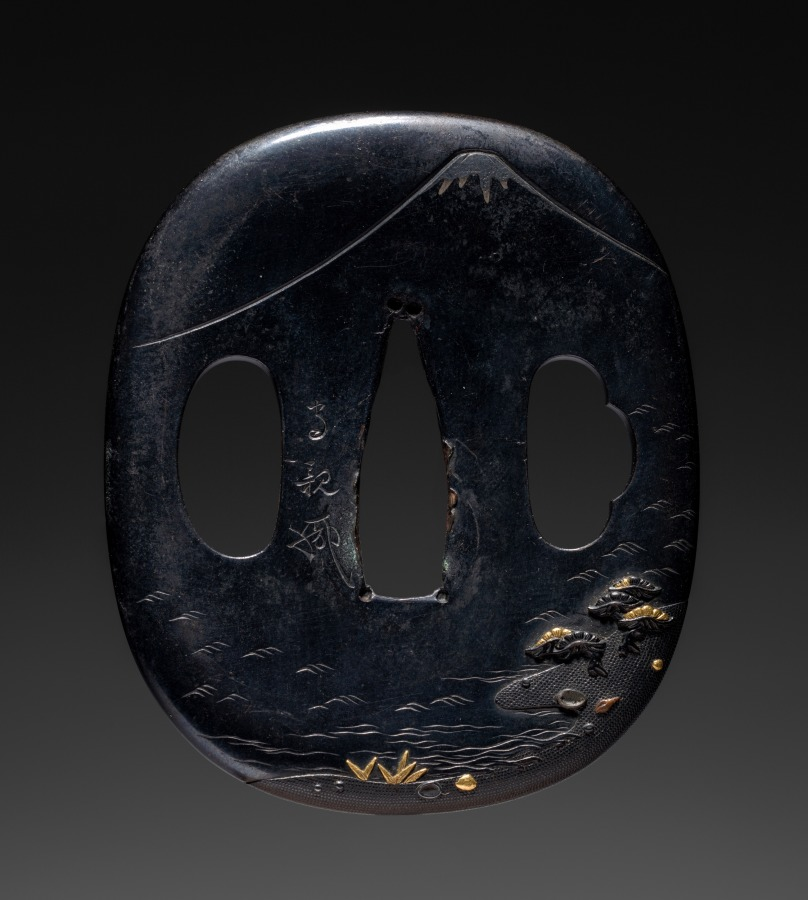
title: Sword Guard (Tsuba) with Mt. Fuji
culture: Japan, Edo period (1615–1868)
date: mid-1800s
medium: iron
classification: Arms and Armor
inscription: Signature: Morichika with seal